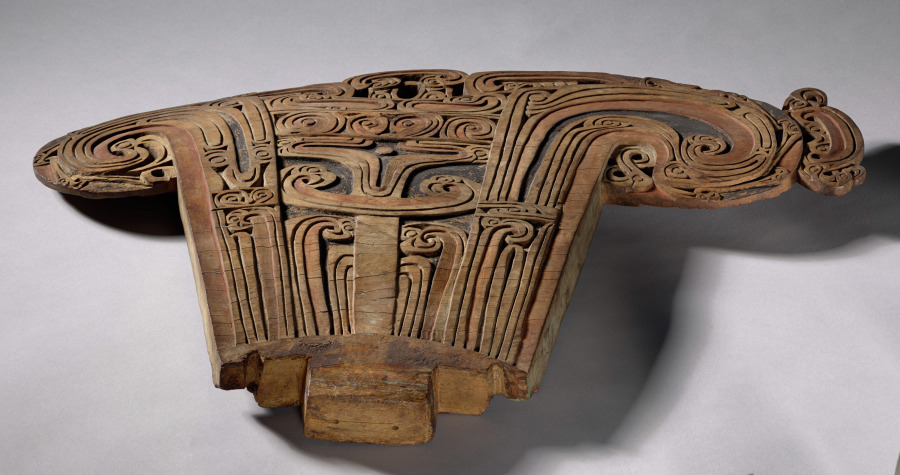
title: Canoe Splashboard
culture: Melanesia, Papua New Guinea, Massim Area, Trobriand Islands, 19th century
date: 1800s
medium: wood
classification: Sculpture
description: Trobriand Islanders often travel great distances by canoe to exchange ceremonial objects. Elaborately carved splashboards offered spiritual protection to the voyagers. Stylized frigate birds ornament this example.